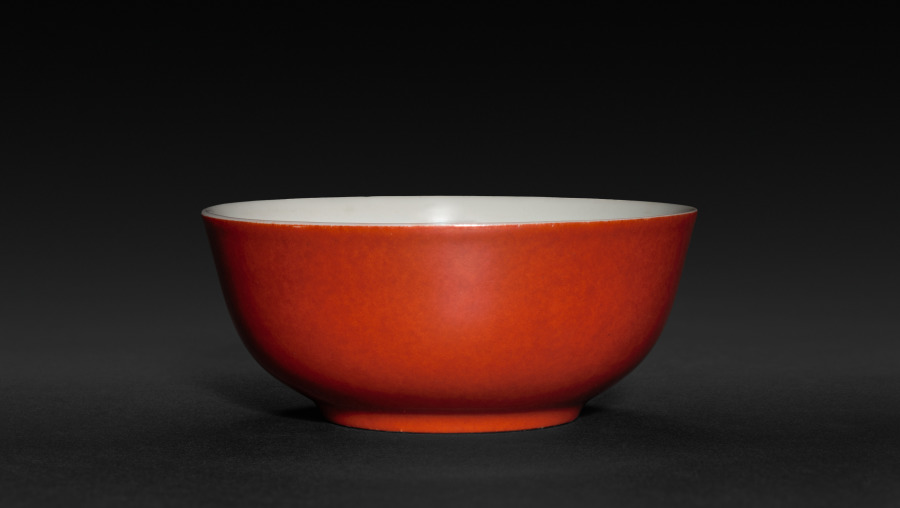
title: Bowl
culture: China, Jiangxi province, Jingdezhen kilns, Qing dynasty (1644-1911), Yongzheng reign (1722-35)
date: 1723–35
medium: porcelain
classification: Ceramic